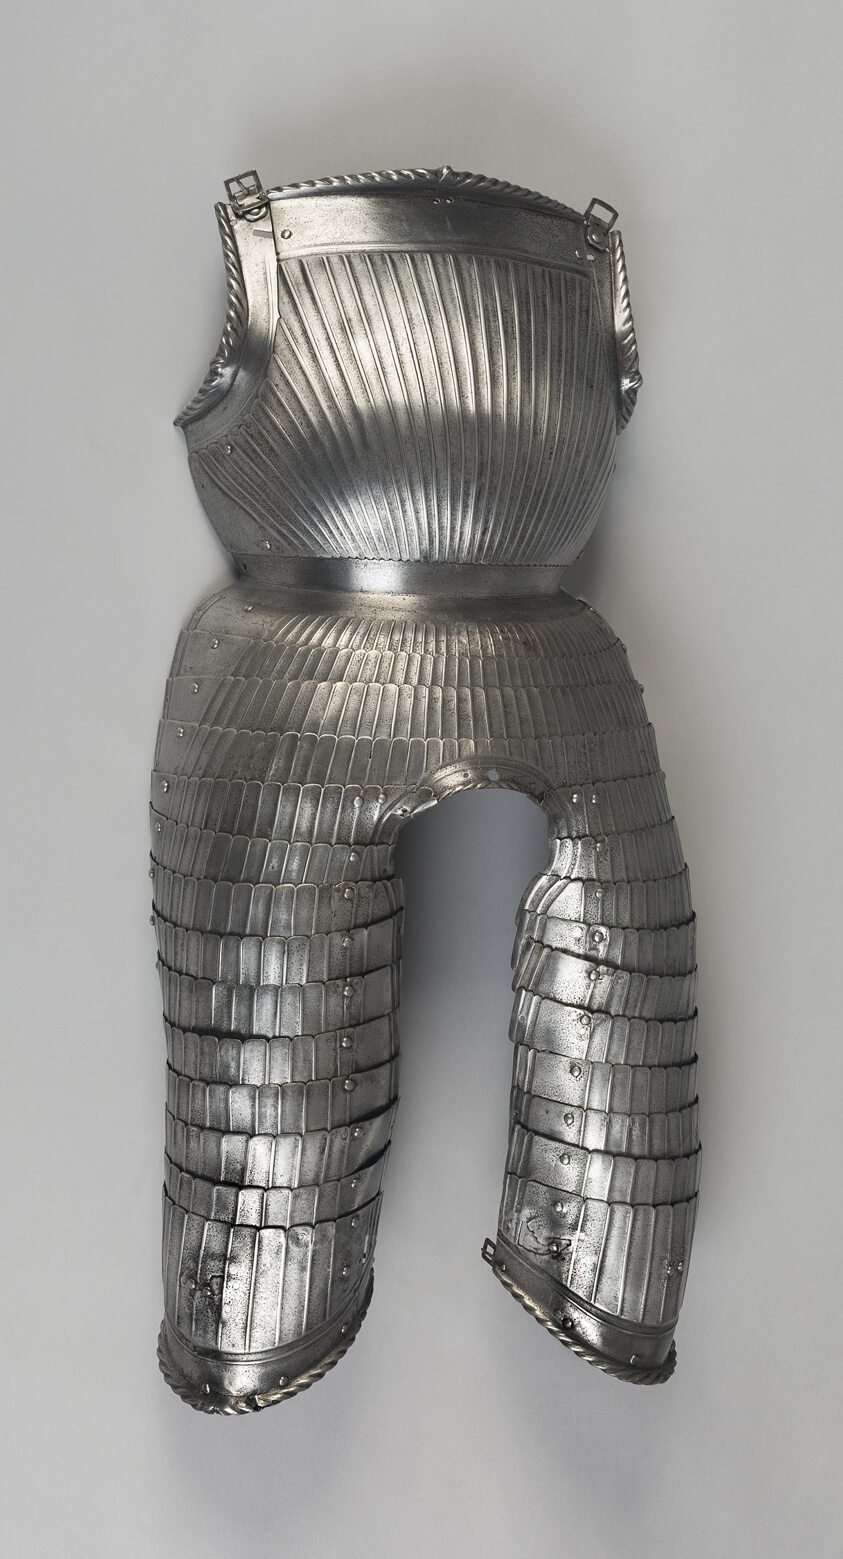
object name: Armor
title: Breastplate with Tassets (Thigh Defenses)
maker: South German, possibly Nuremberg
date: 1520-30 with some modern restoration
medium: Steel and leather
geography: Germany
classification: suit-element; armor; arms and armor